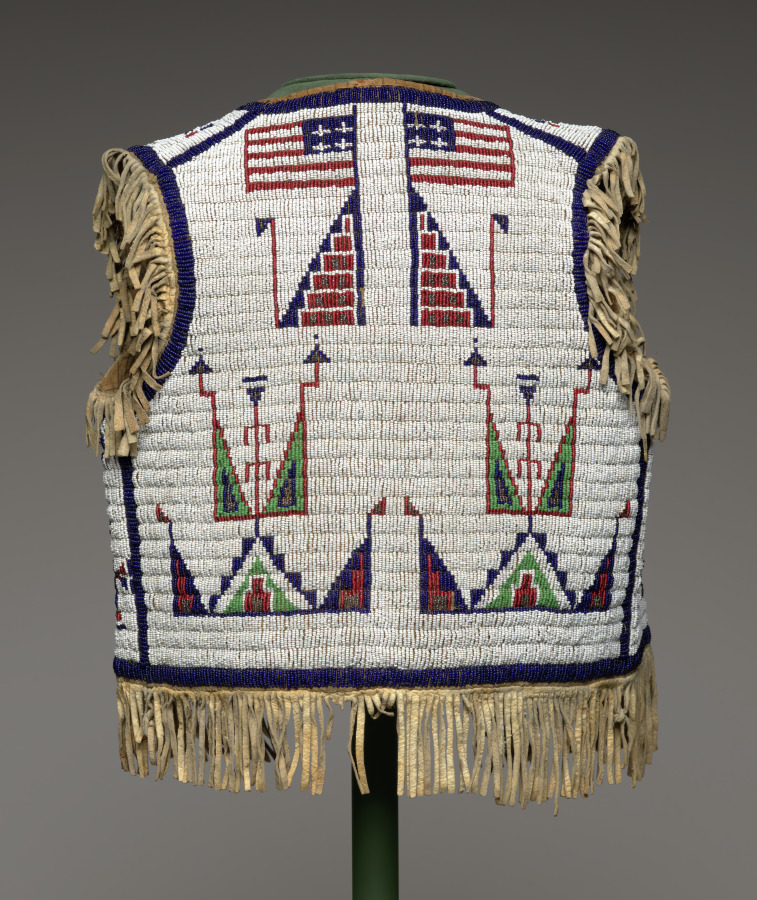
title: Boy's Vest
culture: Plains, Lakota (Sioux), 19th century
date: c. 1880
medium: beadwork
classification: Garment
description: For centuries, beautiful garments and objects have held great meaning for the native groups of the Great Plains. For instance, the Lakota (Sioux) ceremonially intone something sacred wears me. That is, humans don powerful garments but are worn, animated, and protected by the sacred forces within their materials and imagery. By 1700 European Americans began to make their presence felt in the region, and Plains people creatively adopted European materials and garment types into their wardrobes. By 1870 most Plains people had been forced onto reservations, and traditional life shattered—especially for men. The garments on display here all were made after that date.